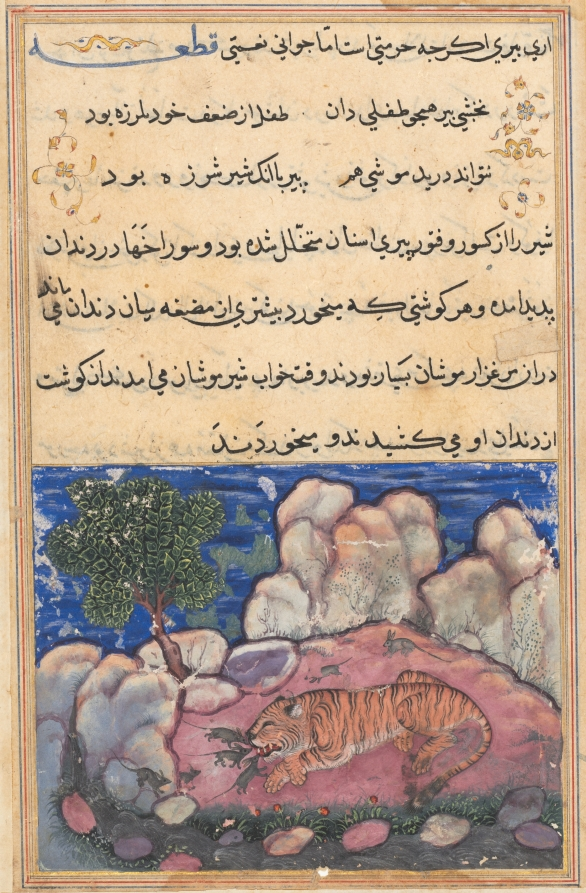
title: The lion disturbed by mice who eat the food trapped in his aging teeth, from a Tuti-nama (Tales of a Parrot): Fifteenth Night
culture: India, Mughal court, 16th century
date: c. 1560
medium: gum tempera, ink, and gold on paper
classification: Painting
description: In a scene that was overpainted to suit the taste of the emperor Akbar for soft modeling and a naturalistic sky, a tiger lies in a pink clearing, while mice run around him to pick at his teeth. The artist has depicted a tiger instead of a lion, the two often being interchangeable in Indian art. In the story, the lion had grown old and suffered from cavities, into which his food would get stuck. Mice would come and feed on those morsels between his teeth and disturb his sleep.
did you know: This story takes place in China